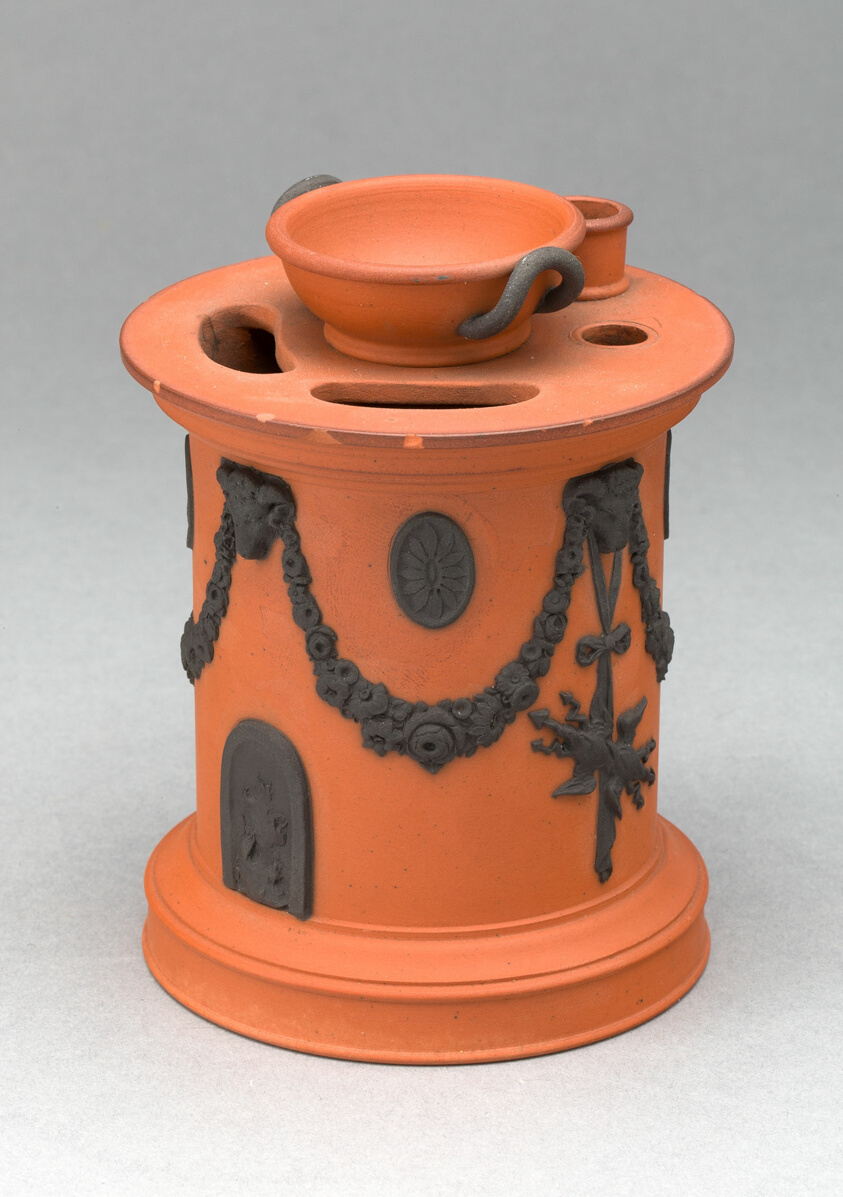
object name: Ceramics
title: Inkstand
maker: Wedgwood Manufactory (England, founded 1759)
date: 1810/20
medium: Earthenware (rosso antico)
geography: Burslem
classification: accessories (object genre); stoneware; european decorative arts; ceramics